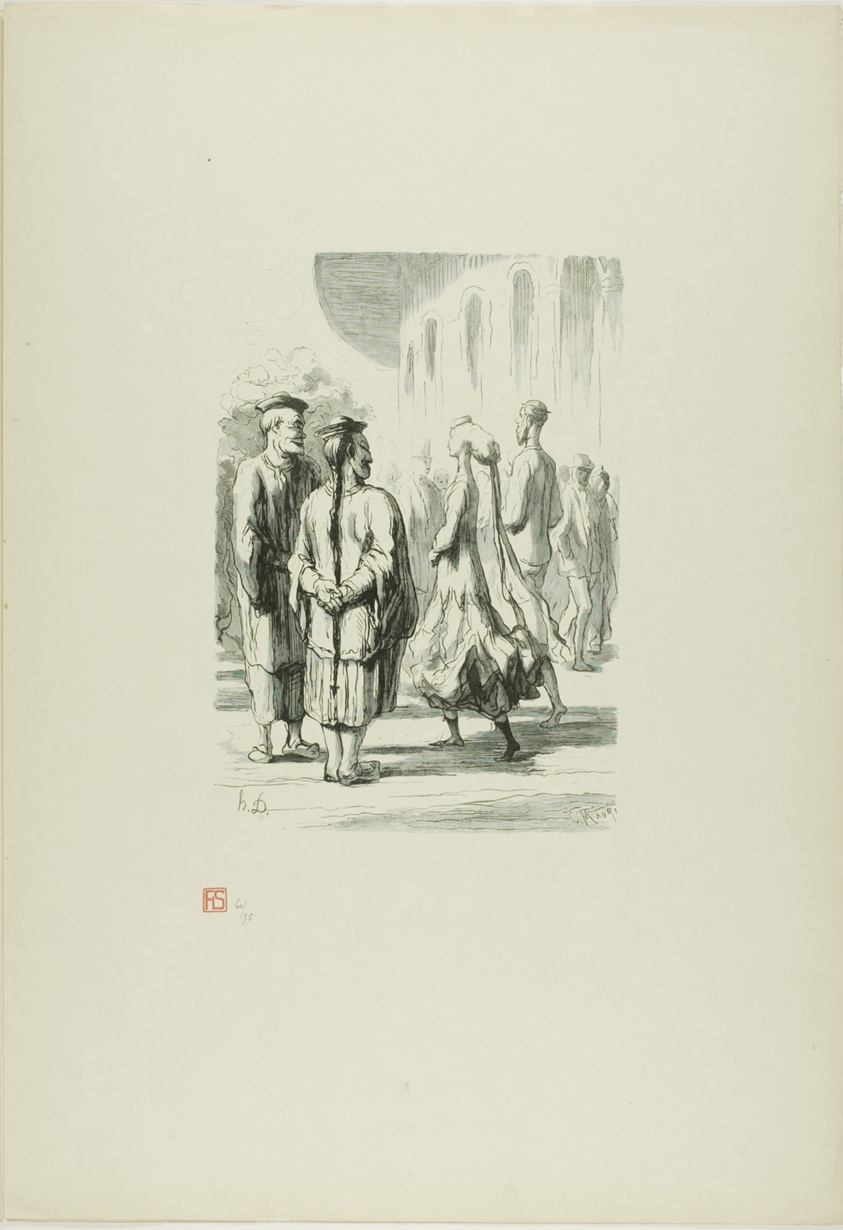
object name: Print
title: At the Universal Exhibition: Who are the real Chinese?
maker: Charles Maurand (French, 1824-1904); after Honoré Victorin Daumier (French, 1808-1879); printed by François Louis Schmied (Swiss, 1873-1941); published by Jules Meynial (French, 20th century)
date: 1867, printed 1920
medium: Wood engraving on cream Japanese paper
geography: France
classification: wood engraving; print; prints and drawing